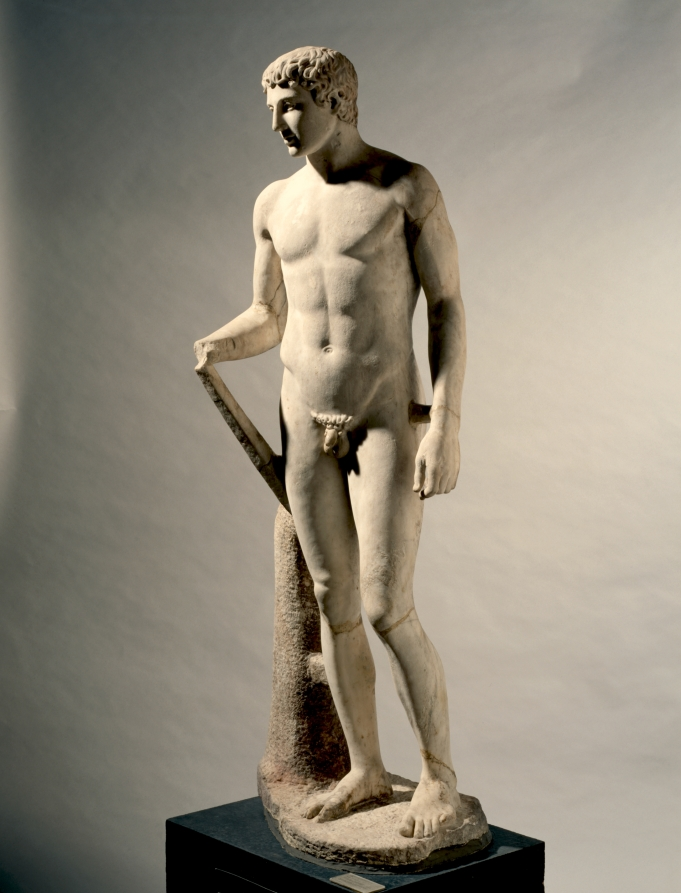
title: Statue of an Athlete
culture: Italy, Roman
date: 1–100 CE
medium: marble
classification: Sculpture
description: This idealized athlete recalls Greek sculptural types invented and popularized during the 400s BC. Large-scale athletes and other sculptures like this were originally created by famous artists as sanctuary dedications. Centuries later, they were widely copied and adapted by Roman sculptors, whose clients sought their own versions of earlier masterpieces. Working in marble rather than bronze, these sculptors added certain elements for stability, such as the struts and the large tree trunk beside the right leg here. Sculptures like this one are profoundly complex, made by and for Romans but descended from Greek ancestors.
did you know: For many years, this sculpture stood in the rotunda of the Cleveland Museum of Art.